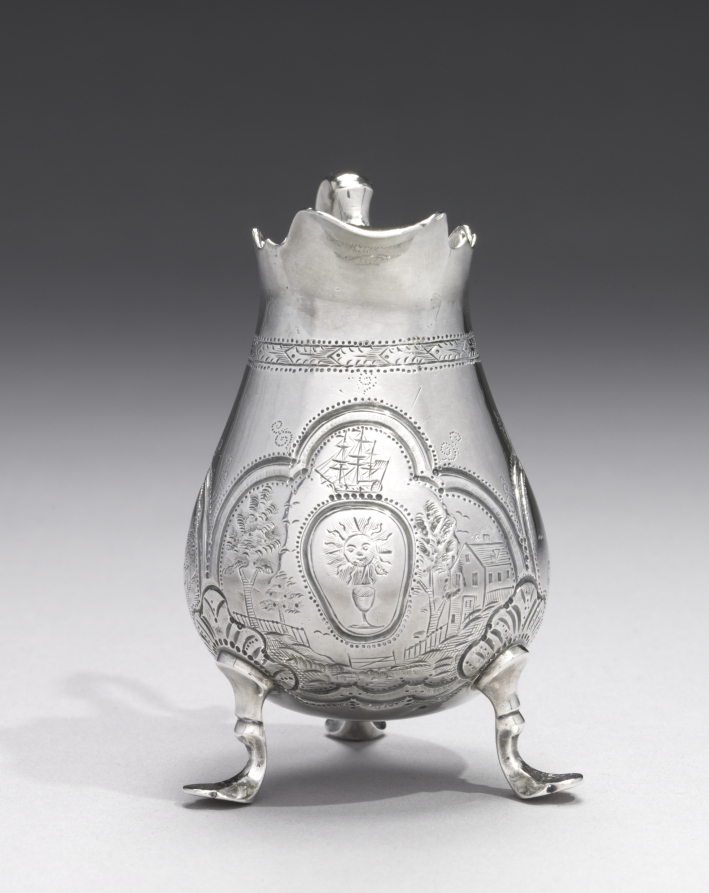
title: Cream Jug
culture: America, Massachusetts, Boston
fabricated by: Jacob Hurd (American, 1702–1758)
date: 1740–50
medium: silver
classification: Silver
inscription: engraved: coat of arms on front of body, underneath spout, and ECP (later) in script on bottom.